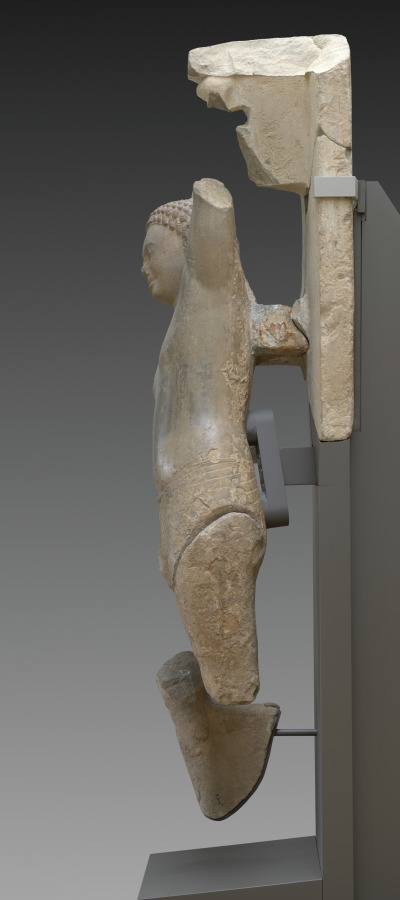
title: Krishna Lifting Mount Govardhan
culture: Southern Cambodia, Takeo Province, Phnom Da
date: c. 600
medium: Sandstone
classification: Sculpture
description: This masterwork of early Cambodian sculpture shows the Hindu god Krishna effortlessly holding aloft a mountain to protect his fellow villagers and herds from torrential storms sent by a jealous old god. It is one of eight monumental monolithic figures recovered from a two-peaked mountain in the floodplains of the Mekong River delta, on the outskirts of the ancient urban center of Angkor Borei.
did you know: Gold earrings were once fastened to the sculpture using holes in the figure's earlobes.